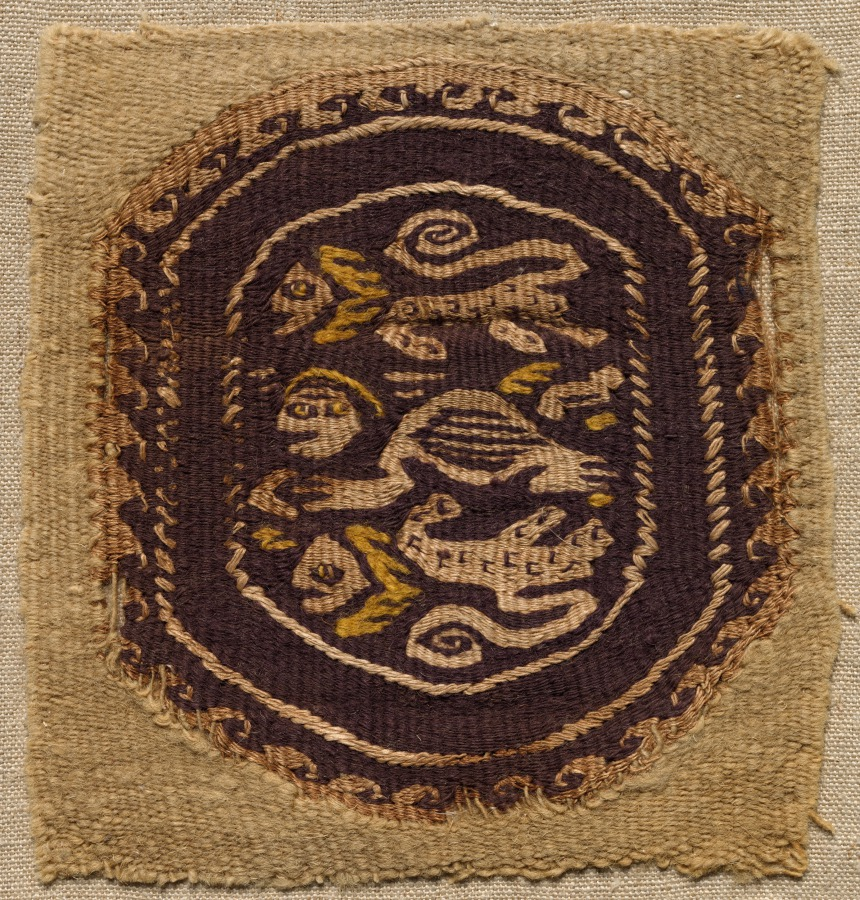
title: Fragment, with a Segmentum, from a Tunic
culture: Egypt, Byzantine period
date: 400s - 600s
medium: tabby weave with interwoven tapestry ornament, linen and wool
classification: Textile